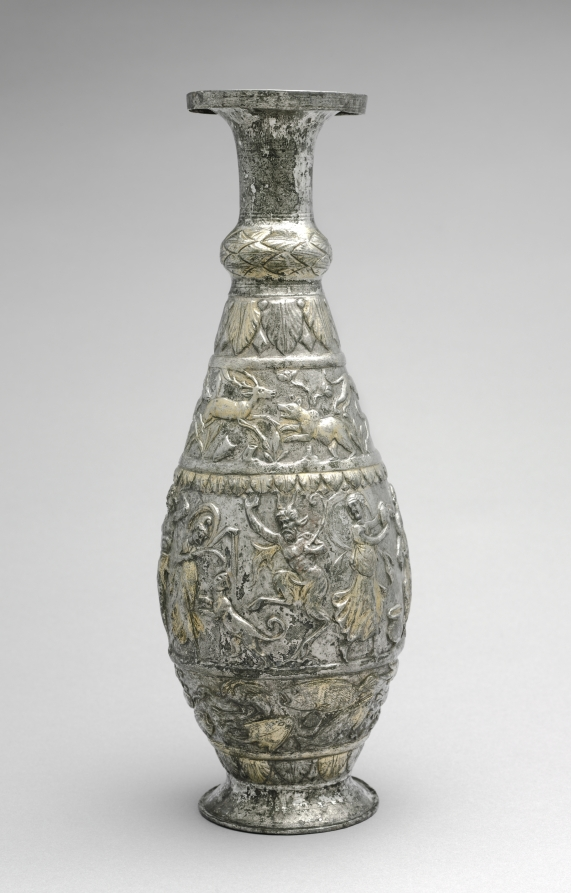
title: Ewer (Pitcher) with Game, Seafood, and Wine Scenes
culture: Byzantium, Syria(?), Byzantine period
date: late 300s CE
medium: silver with traces of gilding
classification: Metalwork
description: This magnificent pitcher, called a ewer, was almost certainly meant for serving wine in the dining room of a wealthy home. On its surface are images in three bands representing the expected bounty of the hunt. Deer pursued by a lioness and hares chased by dogs appear in the top band, signifying the wealth of game the owner hoped to have on the family table. In the lowest band are edible sea creatures, while the center features the merry followers of the Roman wine god Bacchus (Dionysos in Greek).